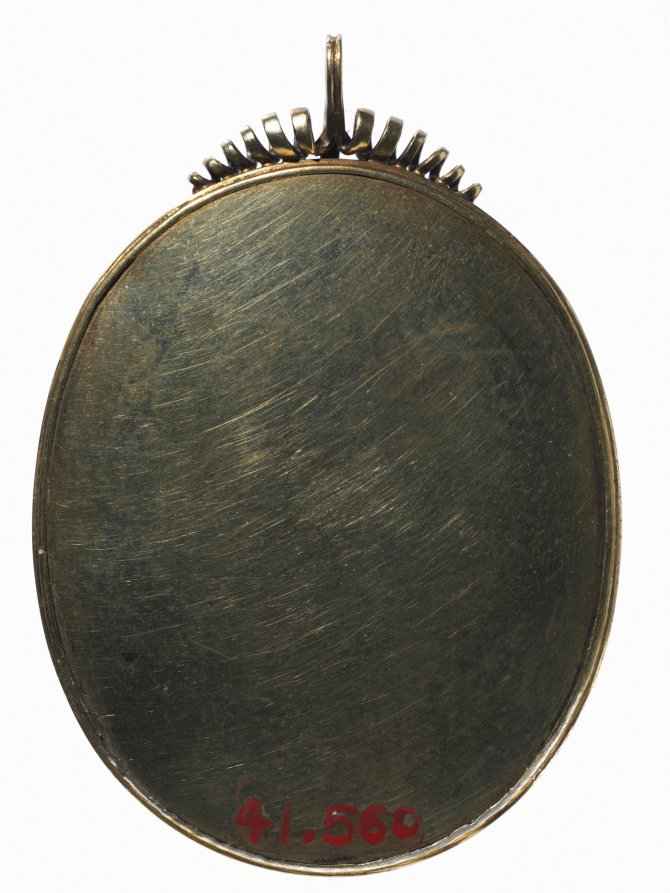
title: Portrait of a Man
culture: England, late 16th-early 17th century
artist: circle of Isaac Oliver (French, c. 1565–1617)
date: c. 1615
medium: watercolor on card in a later silver gilt frame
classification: Portrait Miniature